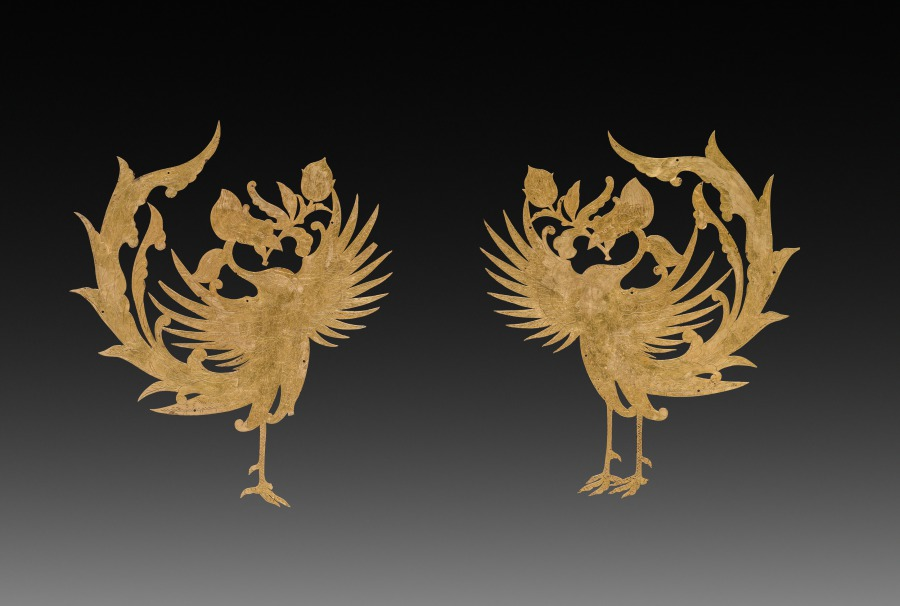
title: Textile Ornaments(?): Pair of Phoenixes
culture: China, Tang dynasty (618-907)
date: c. 700s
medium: beaten gold with chased detail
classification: Metalwork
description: These two phoenix birds made of thin gold foil have tiny holes all along their edges, suggesting that they were sewn on textiles.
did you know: These two phoenix birds made of thin gold foil have tiny holes all along their edges, suggesting that they were sewn on textiles.